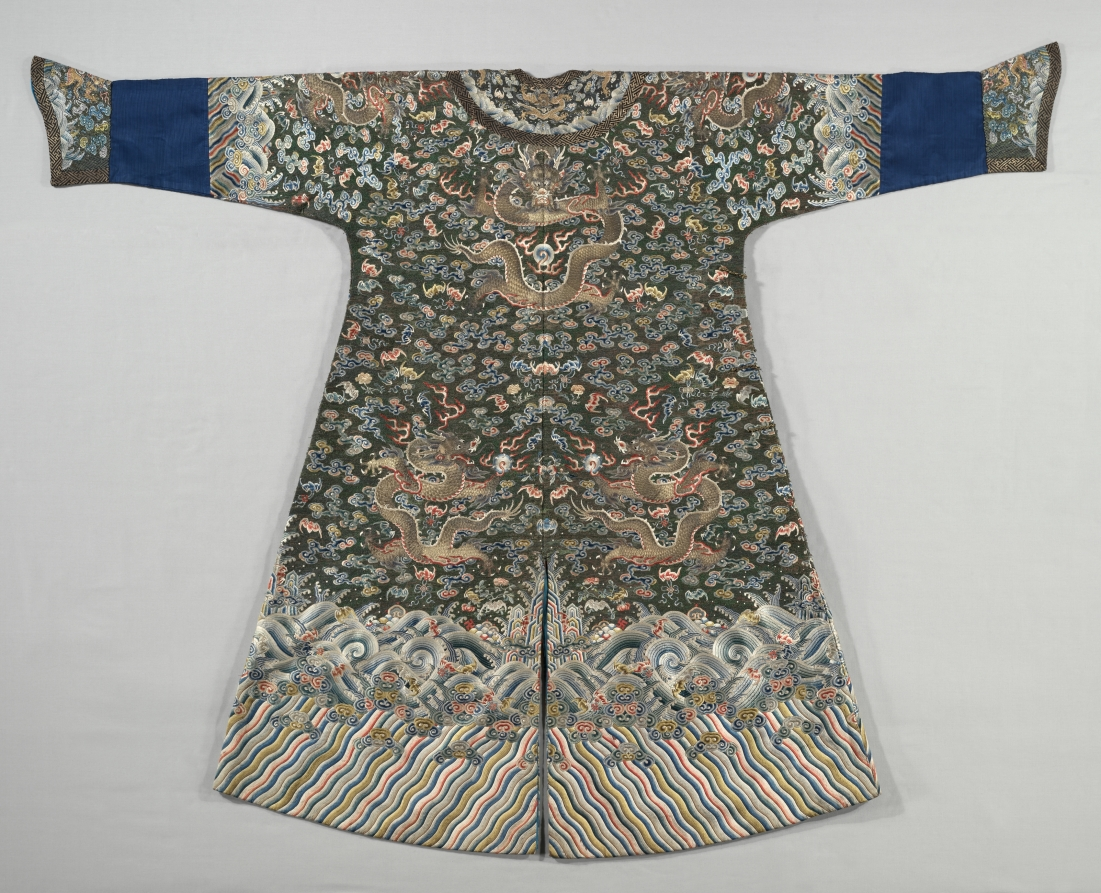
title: Imperial Robe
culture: China, Qing dynasty (1644-1911)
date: 1770s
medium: silk; embroidery with peacock tail feathers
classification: Garment